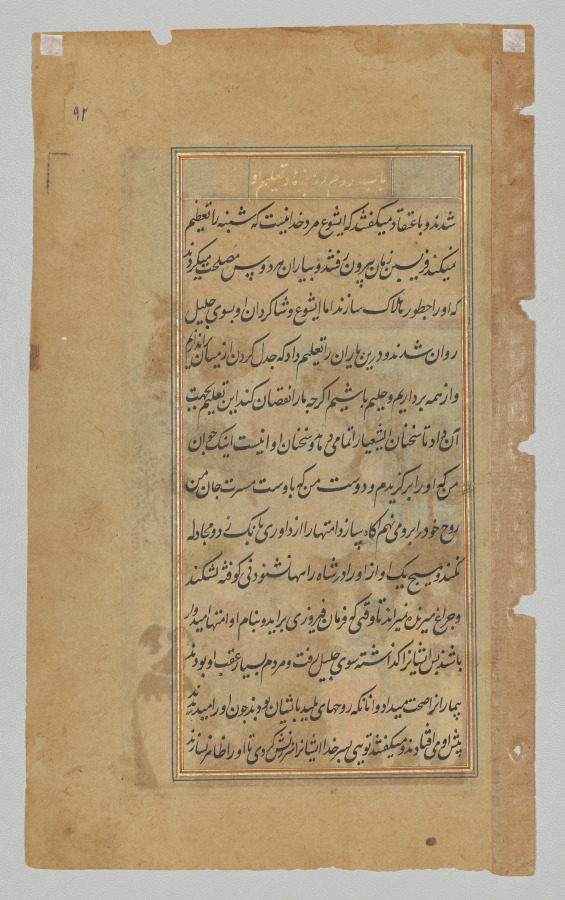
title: Jesus on Mount Tabor, near Nazareth where he Chooses Twelve of his Followers and Calls them Apostles (folio 87 verso), from a Mirror of Holiness (Mir’at al-quds) of Father Jerome Xavier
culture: Mughal India, Allahabad, made for Prince Salim (1569–1627)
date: 1602–04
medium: Gum tempera, ink, color, and gold on paper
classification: Manuscript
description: When Jesus arrived at Mount Tabor, he left his followers at the foot of the hill and spent the entire night in prayer. This is the only night scene in the manuscript, and the artist has used glowing colors and gold paint to dot the night sky with stars. Seven of the 12 apostles mill around the foreground; some converse with animated gestures, possibly debating the contents of a text. At dawn Jesus will have summoned the 12, named them his apostles and given them the power to drive out unclean spirits and heal the sick and infirm.